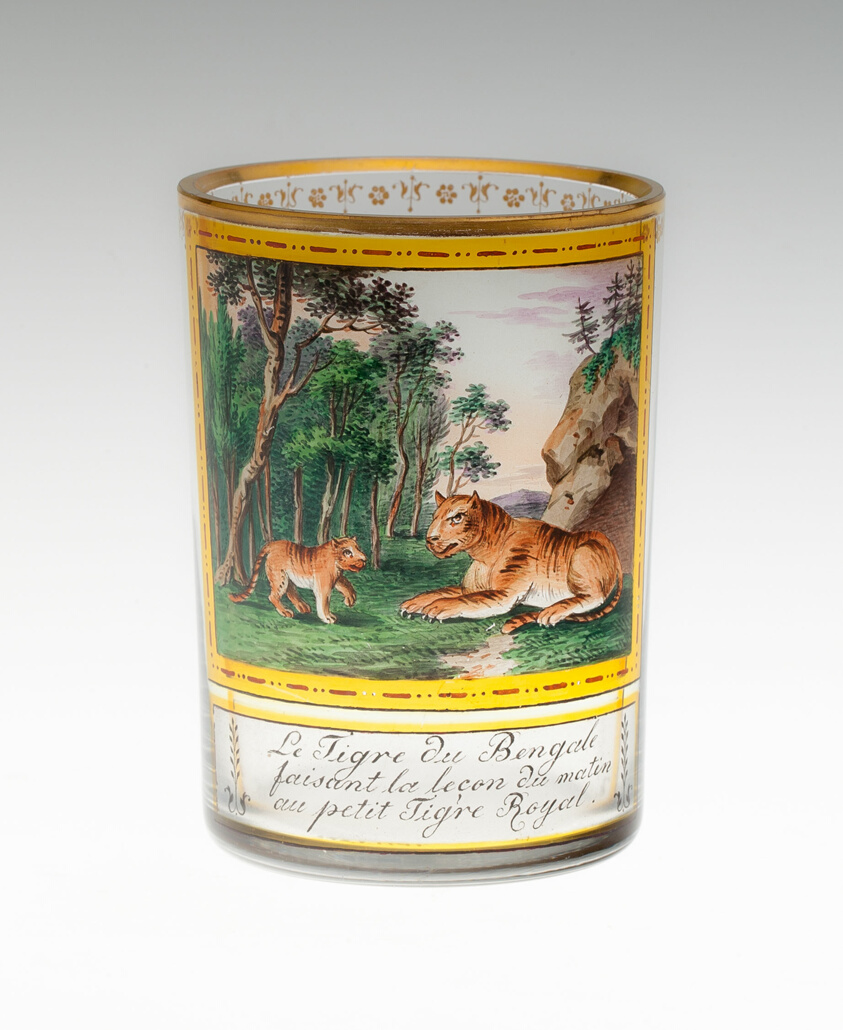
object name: Glass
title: Beaker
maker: Austria, Vienna; Anton Kothgasser (Austrian, 1769-1851)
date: c. 1815/20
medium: Glass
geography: Vienna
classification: drinking vessel; glass; european decorative arts